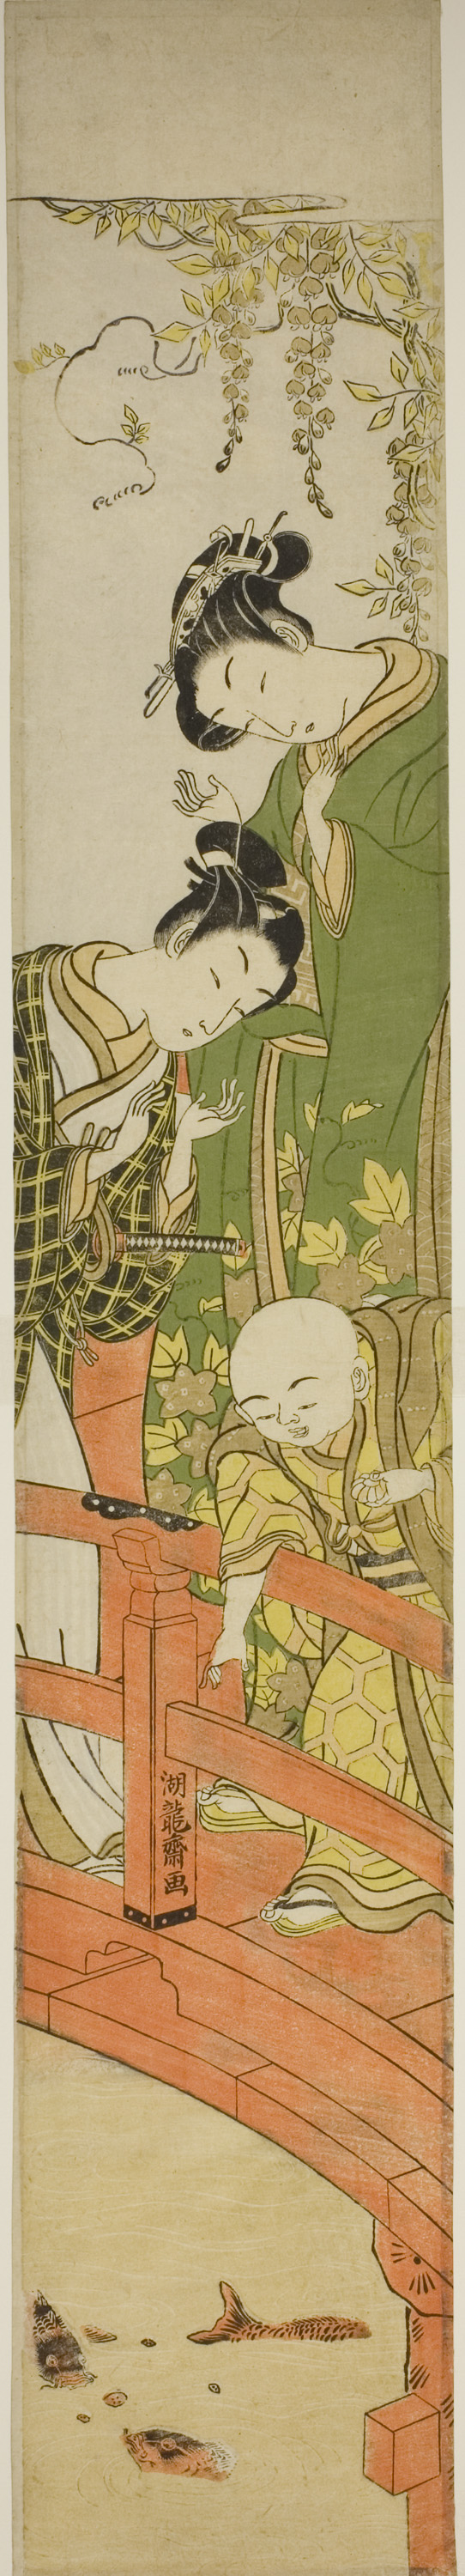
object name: Print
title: Feeding the Carp at Kameido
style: Japanese (culture or style)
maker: Isoda Koryusai (Japanese, 1735-1790)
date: c. 1771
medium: Color woodblock print; hashira-e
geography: Japan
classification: woodblock print; print; asian art